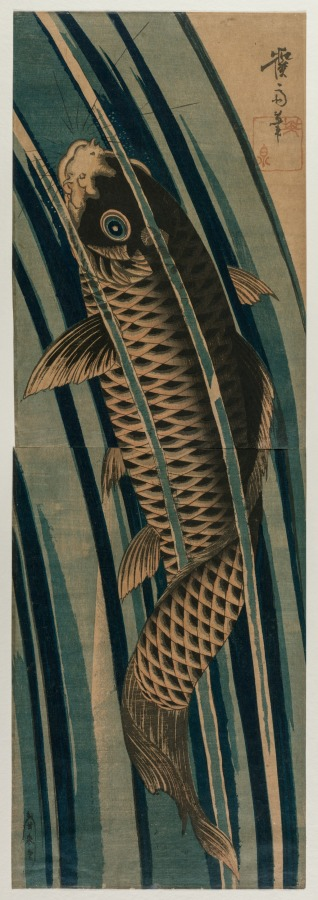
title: Carp Ascending a Waterfall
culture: Japan, Edo period (1615–1868)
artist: Keisai Eisen (Japanese, 1790–1848)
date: early or mid-1830s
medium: color woodblock print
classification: Print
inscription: Signature: Keisai hitsu. Seal: Eisen. Publisher: Izumiya Ichibei (Kansendo)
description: In Asian lore the carp is associated with good fortune and perseverance. Although the carp lives primarily in quiet waters, its symbolic meanings have led to a Japanese design convention of showing the fish arching upward, often mounting waterfalls, as in this print.